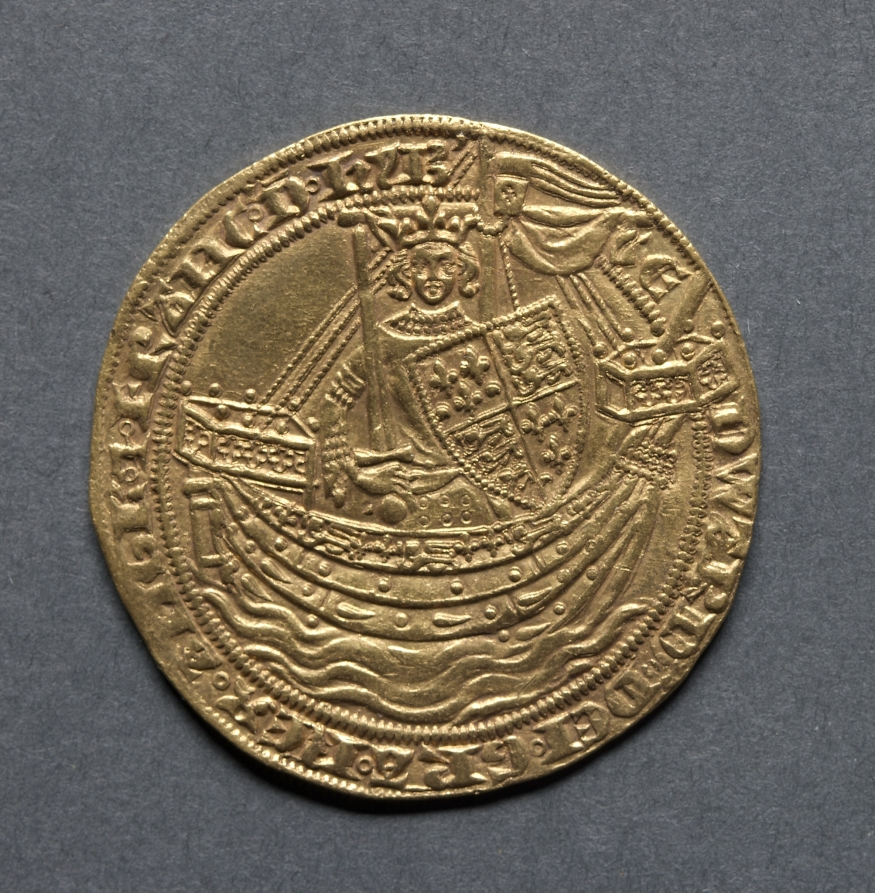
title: Noble: Edward III Standing in Ship with Shield of Arms (obverse)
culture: England, Edward III, 1327-1377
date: 1351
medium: gold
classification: Coins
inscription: EDWARD DEI GRA REX ANGLE Z FRANC D HYB